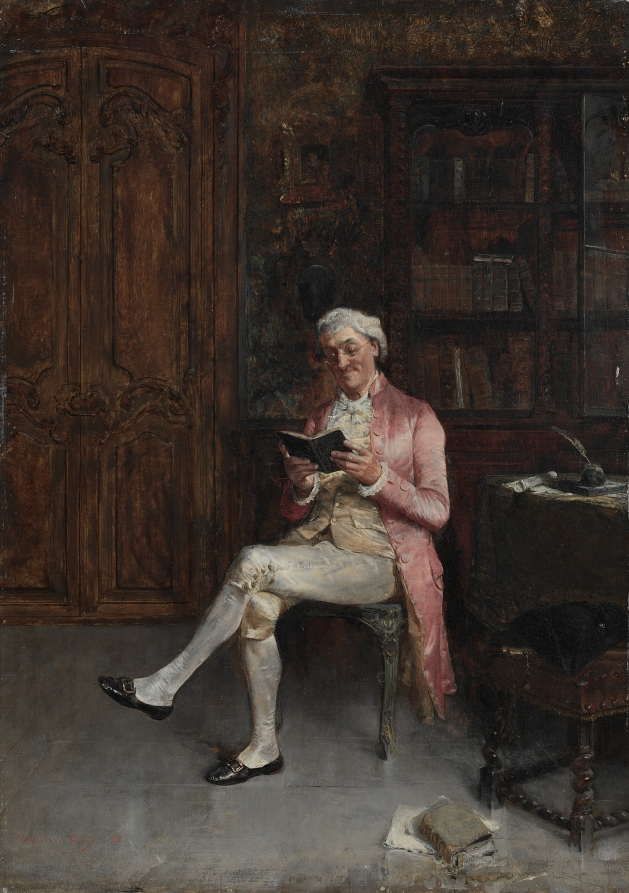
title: A Philosopher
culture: America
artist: Walter Gay (American, 1856–1937)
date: 1882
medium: oil on panel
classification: Painting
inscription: signed lower left: Walter Gay 82